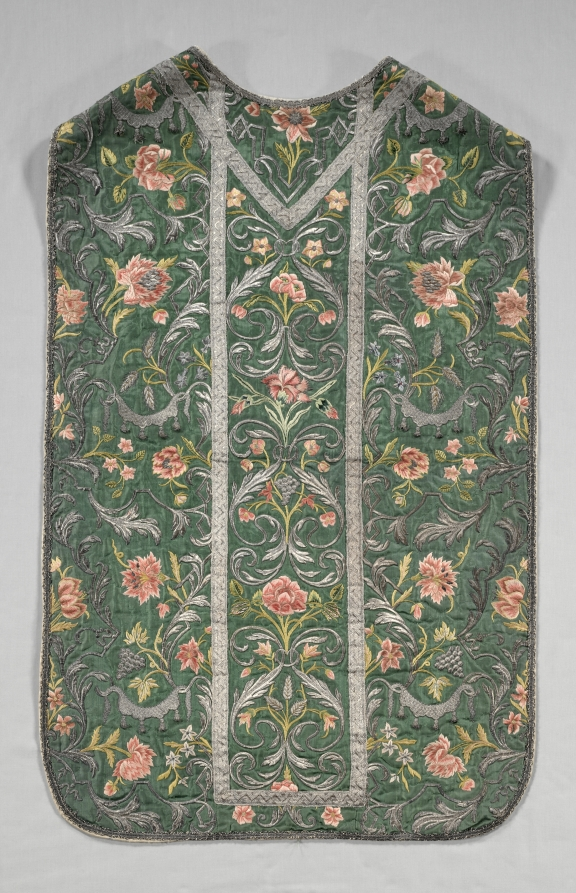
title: Chasuble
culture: Italy, 18th century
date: 1700s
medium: Silk and metallic threads: embroidery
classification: Embroidery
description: Sheaves of wheat and bunches of grapes, symbols of the bread and wine of the Mass, are embroidered with silver-metal thread amid scrolling leaves on the green silk-damask ground of this chasuble. Liturgical colors—white, red, green, and black, purple, or blue—mandated by Pope Innocent III in the late 1100s were widely ignored by the 1700s, replaced primarily by a lavish use of gold, silver, and pastel silk thread embroidered on white silk fabrics. Long matching stoles were worn under chasubles in styles that identified deacons, priests, and bishops.